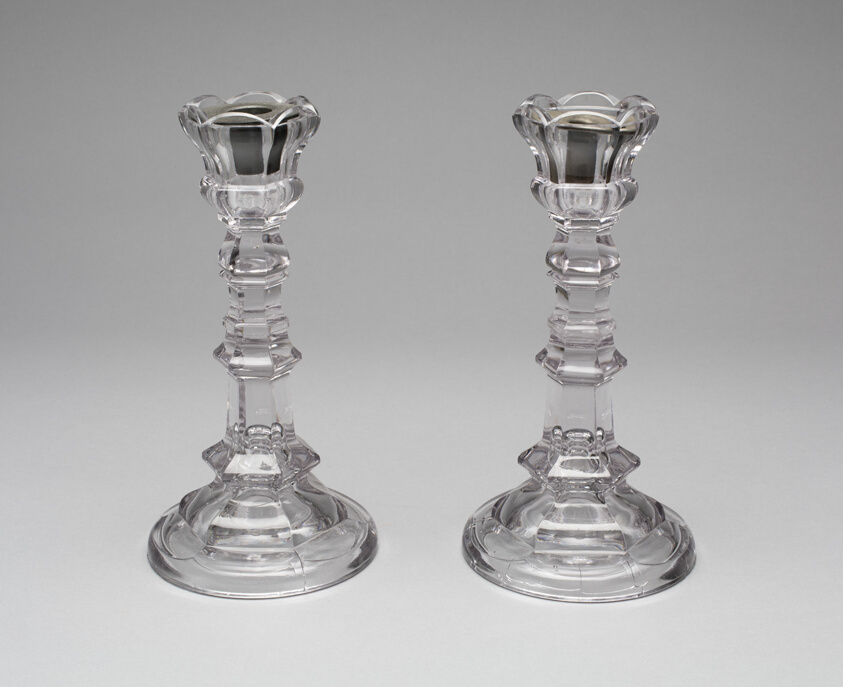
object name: Glass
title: Pair of Candlesticks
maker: Artist unknown (American, 19th century)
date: 1860–1900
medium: Glass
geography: United States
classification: candleholder - candlestick; glass; american decorative arts; american arts; decorative arts